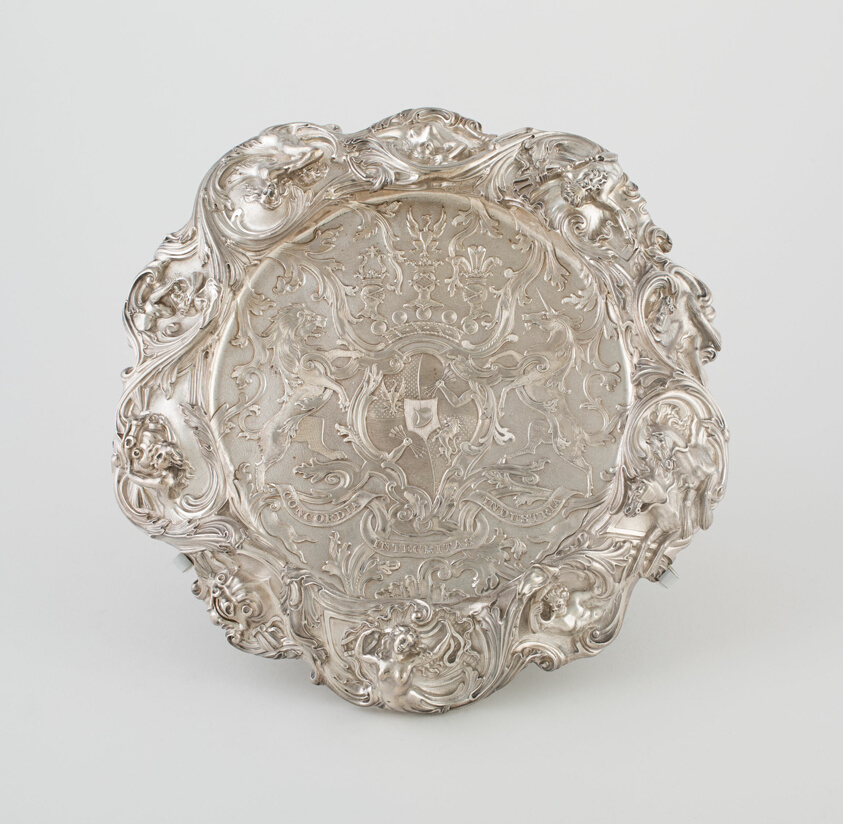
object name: Metalwork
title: Wine Bottle Cooler Stand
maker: Robert Garrard II; English, 1793–1881; London, England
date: 1845–46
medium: Silver on wooden support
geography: London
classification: silver; metalwork; european decorative arts